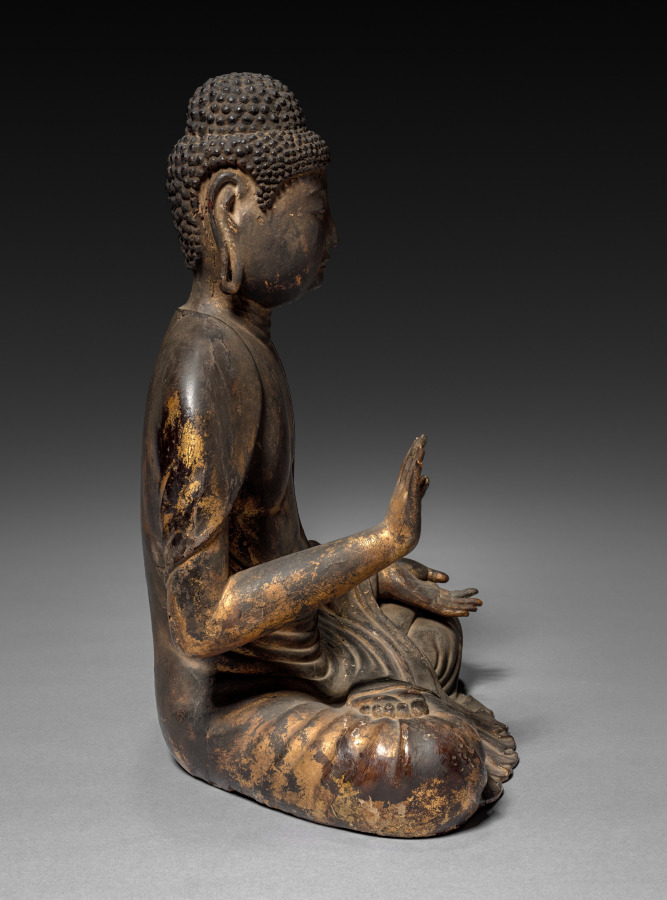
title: Shakyamuni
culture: Japan, Meiji period (1868–1912)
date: c. 1868–1912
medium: Wood with traces of lacquer and gilding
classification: Sculpture